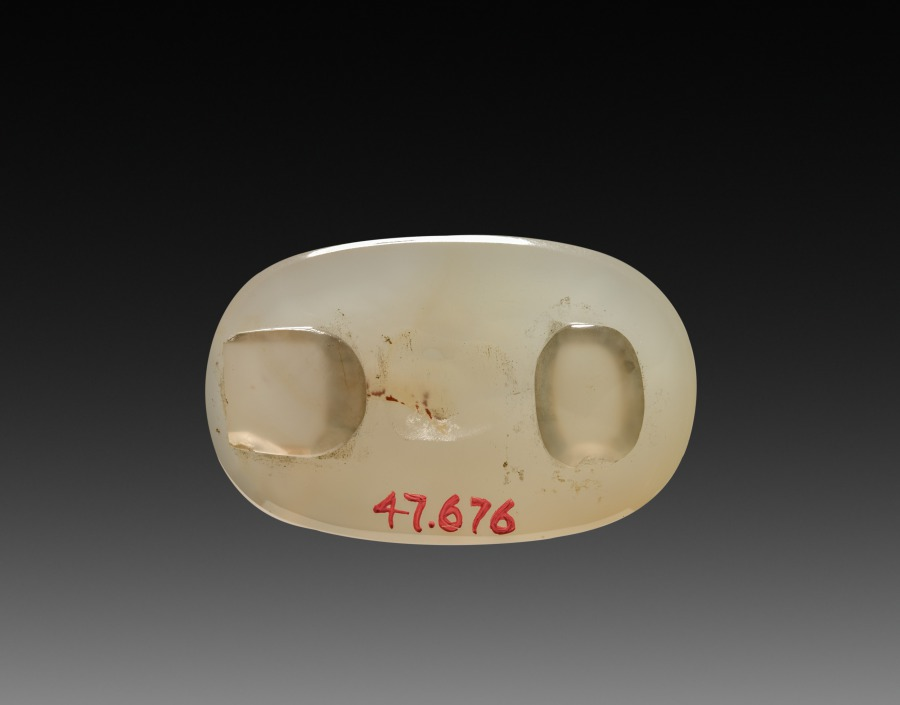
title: Buckle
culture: China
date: 1900s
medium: agate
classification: Jewelry